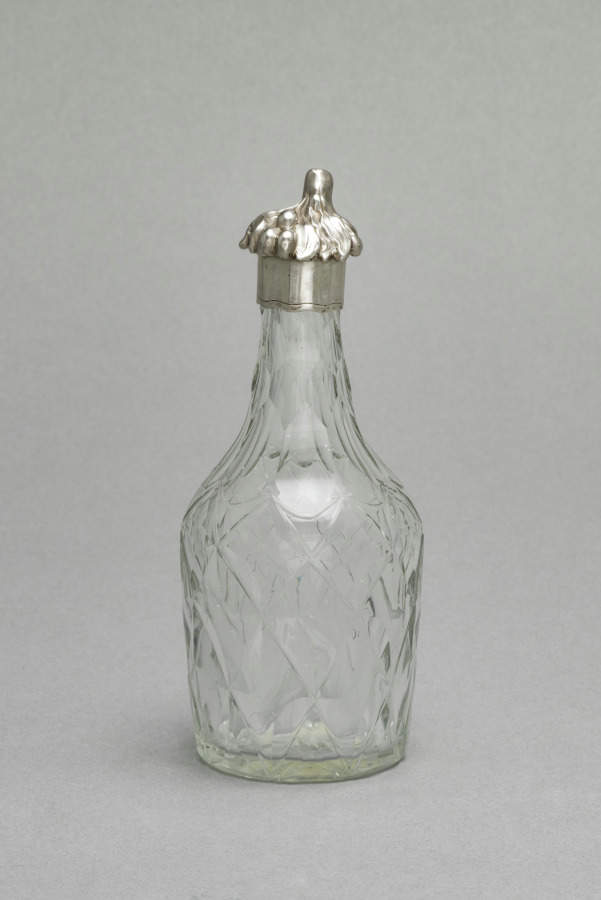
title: Cruet Stand (Bottle)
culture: France, bottle and cover old, but probably not original, 18th Century(?)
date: 1700s(?)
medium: silver and glass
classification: Metalwork